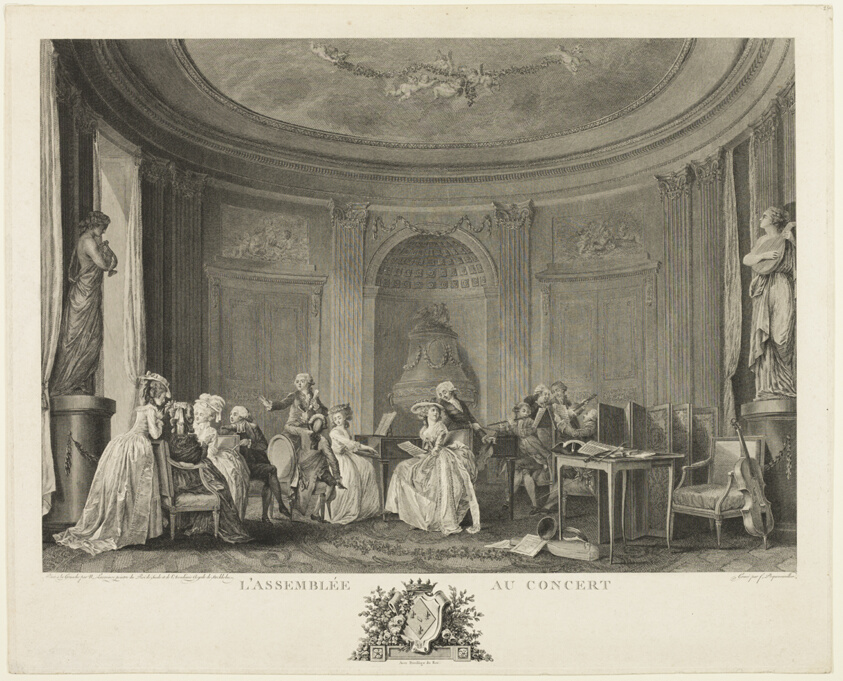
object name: Print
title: The Concert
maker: François Dequevauviller (French, 1745-1807); after Nicolas Lavreince (Swedish, 1737-1807)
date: 1784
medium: Etching and engraving on cream laid paper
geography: France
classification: engraving; print; prints and drawing